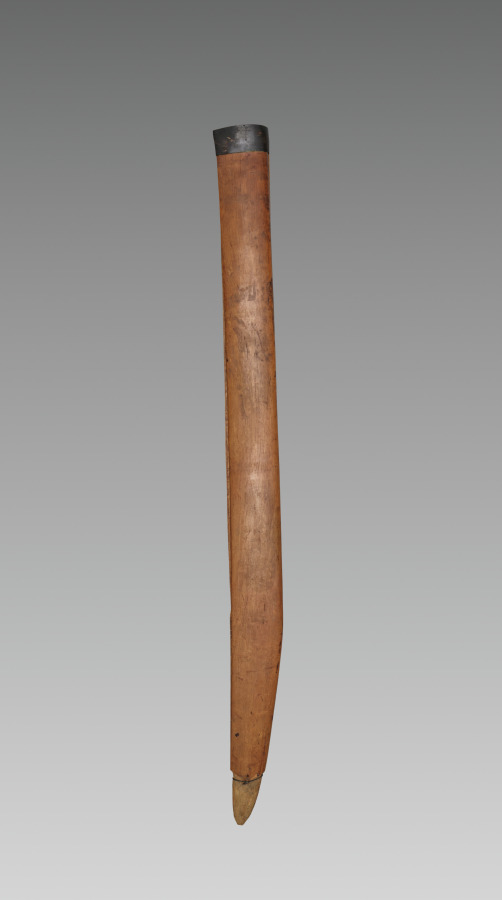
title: Sword and Scabbard (scabbard)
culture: Java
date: 1700s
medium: steel and ivory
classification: Arms and Armor